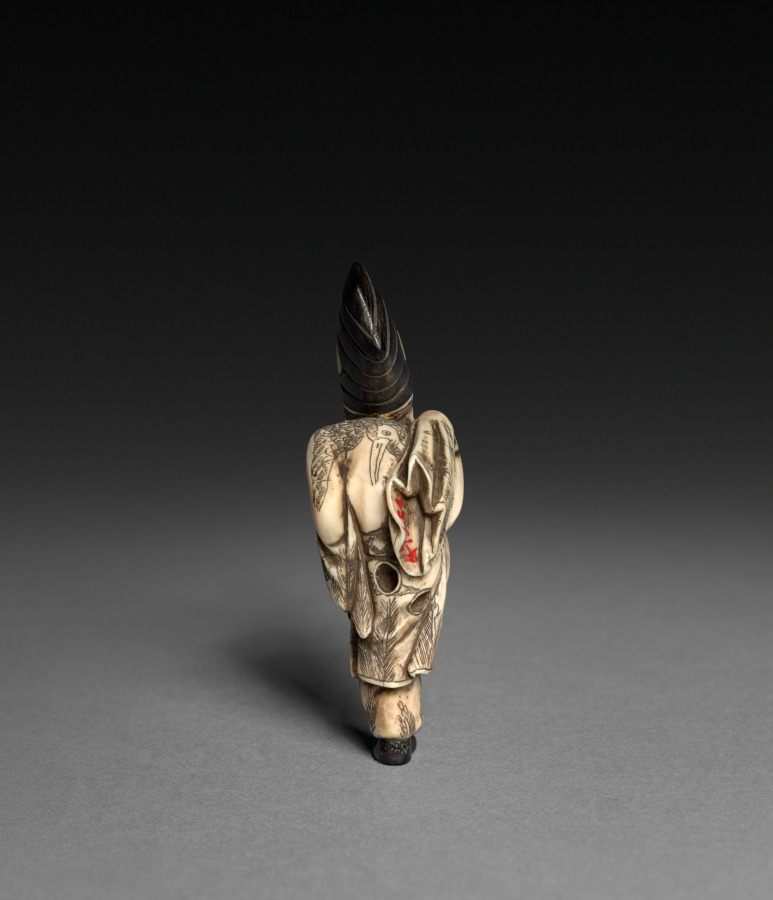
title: Dancing Man with Fan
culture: Japan, Edo period (1615–1868)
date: early to mid-1800s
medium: ivory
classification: Netsuke